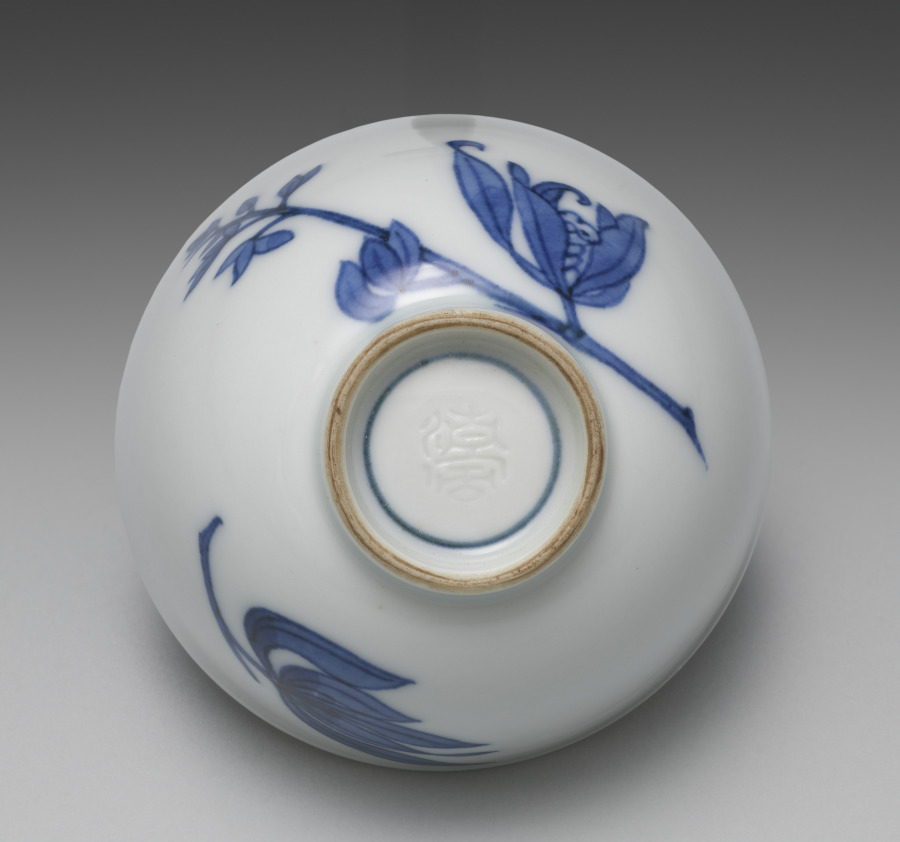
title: Teacup from Tea Set with Orchids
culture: Japan, Meiji period (1868–1912)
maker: Seifū Yohei III (Japanese, 1851–1914)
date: c. 1893–1914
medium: Porcelain with underglaze blue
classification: Ceramic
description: Although the teapot here is stored in a separate box from the five cups, these six pieces may once have been part of a tea set that included other tools such as a water cooler. The teacups have orchid flowers on both sides in underglaze blue, as well as a blue band inside the footring. The teapot has the same design and a blue band painted around the bottom of the lid’s knob. The cups’ long wood storage box is stamped on the exterior, over the lid and base, with a small red seal reading “Satō.” The same seal appears on five small squares of yellow textile, one placed in the bottom of each compartment in the teacup storage box. These are additional to the customary yellow cloths stamped with a “Seifu” seal. Interestingly, four of the Seifū cloths are stamped with an ovoid seal, while the remaining cloth, which is a slightly lighter color, has an unusual seal that is not quite gourd-shaped and with the fū of Seifū in a stylized, unrecognizable form. The teapot has its own box with a Satō seal and is wrapped with an orange textile stamped with the same unusual Seifū seal. A set with a very similar surface design is in the Brooklyn Museum. The Brooklyn set has a water cooler and a small pitcher, in addition to the teapot and cups, and all are in a single storage box. This box records the tea tools as made with kanpakuji, or “bright-jewel white porcelain,” counted among Yohei III’s most important inventions, and carved images. In fact, both sets have a white surface much closer in coloration to the cool white of porcelain clay used in Kyoto at the time, and the designs are simply painted. The Brooklyn set was thus likely mismatched at some point with a box intended for another tea set. Nonetheless, the box may have helped prevent the set’s original components from being dispersed, and the set itself provides insight into how the other tools from the present set may have looked.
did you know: This tea set with orchids has a side-handled pot called a kyūsu, used for steeping, straining, and serving tea.